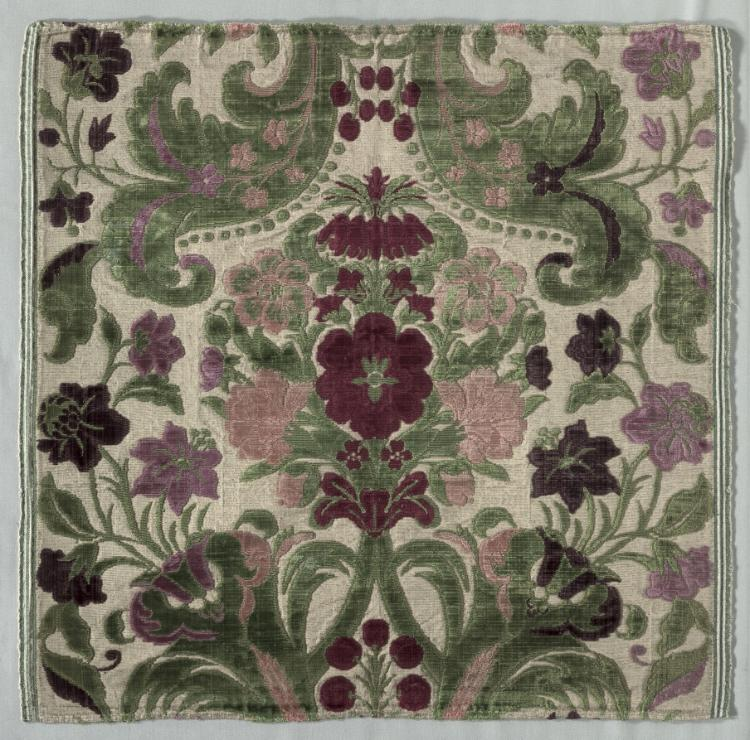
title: Chalice Veil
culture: Italy, Genoa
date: 1600s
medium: velvet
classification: Velvet